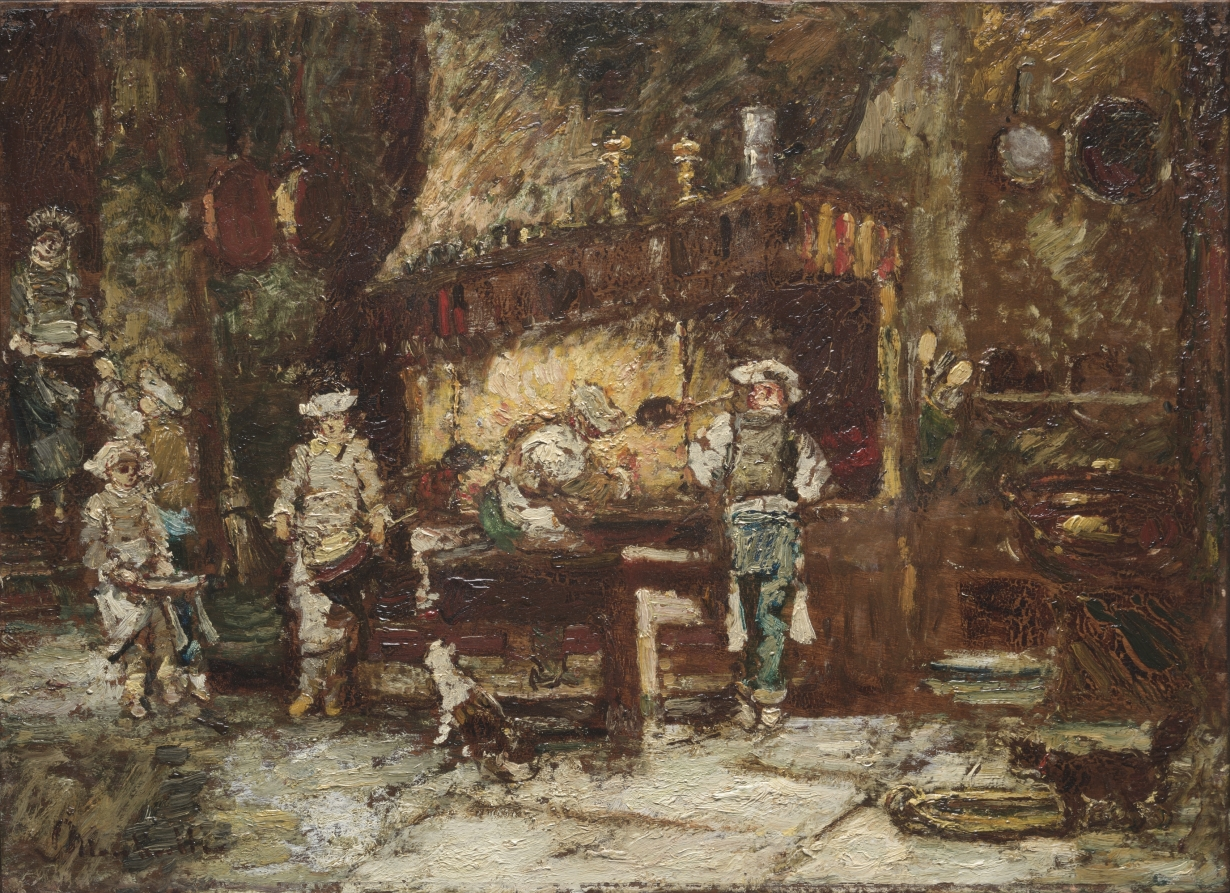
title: The Kitchen of the Rôtisserie des Deux Paons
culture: France, 19th century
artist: Adolphe Monticelli (French, 1824–1886)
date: c. 1875–1881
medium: oil on wood panel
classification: Painting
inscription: Signed lower left: Monticelli